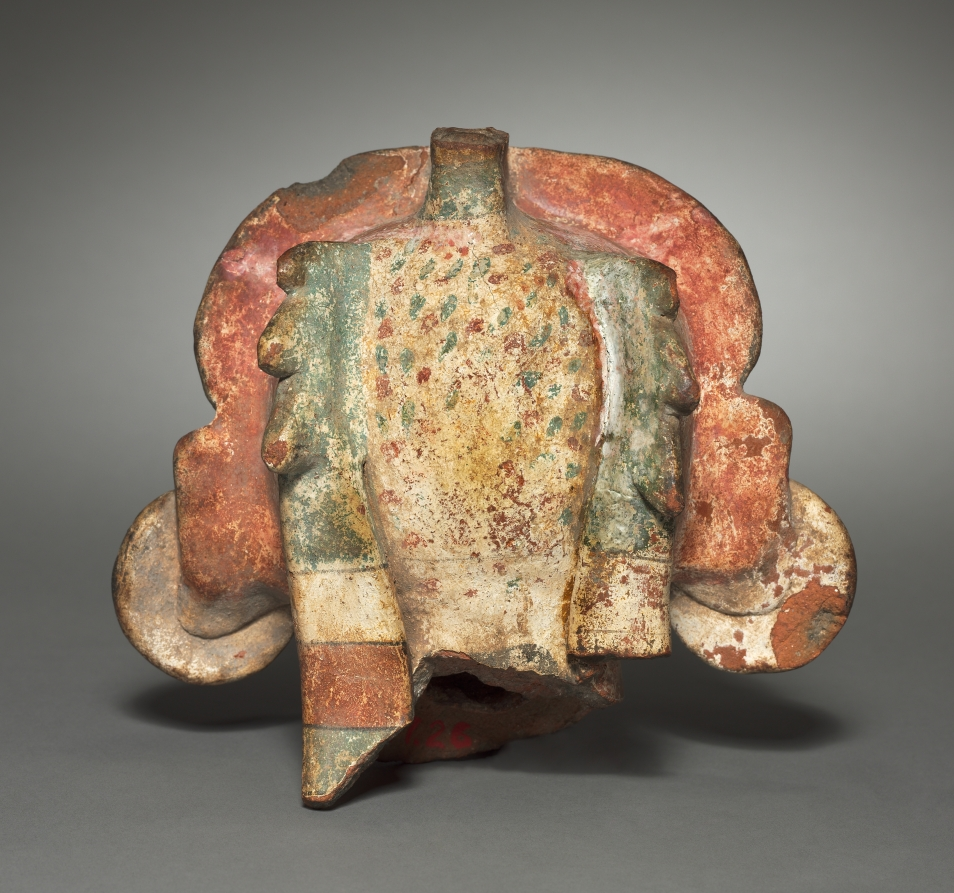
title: Head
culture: Mexico, Classic Veracruz (Totonac or Tajin)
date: 600–1100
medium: pottery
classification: Sculpture